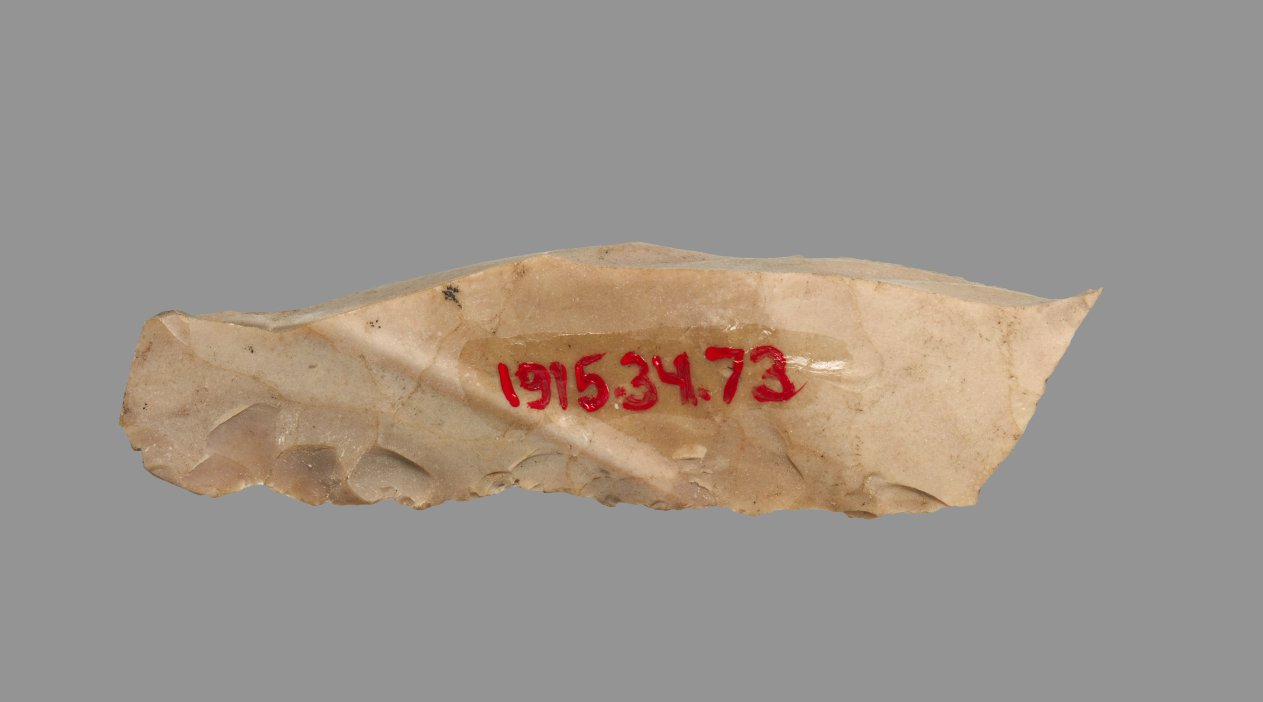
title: Sickle Blade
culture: Egypt, Middle Kingdom (2040–1648 BCE), Dynasty 12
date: 1980–1801 BCE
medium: flint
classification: Implements